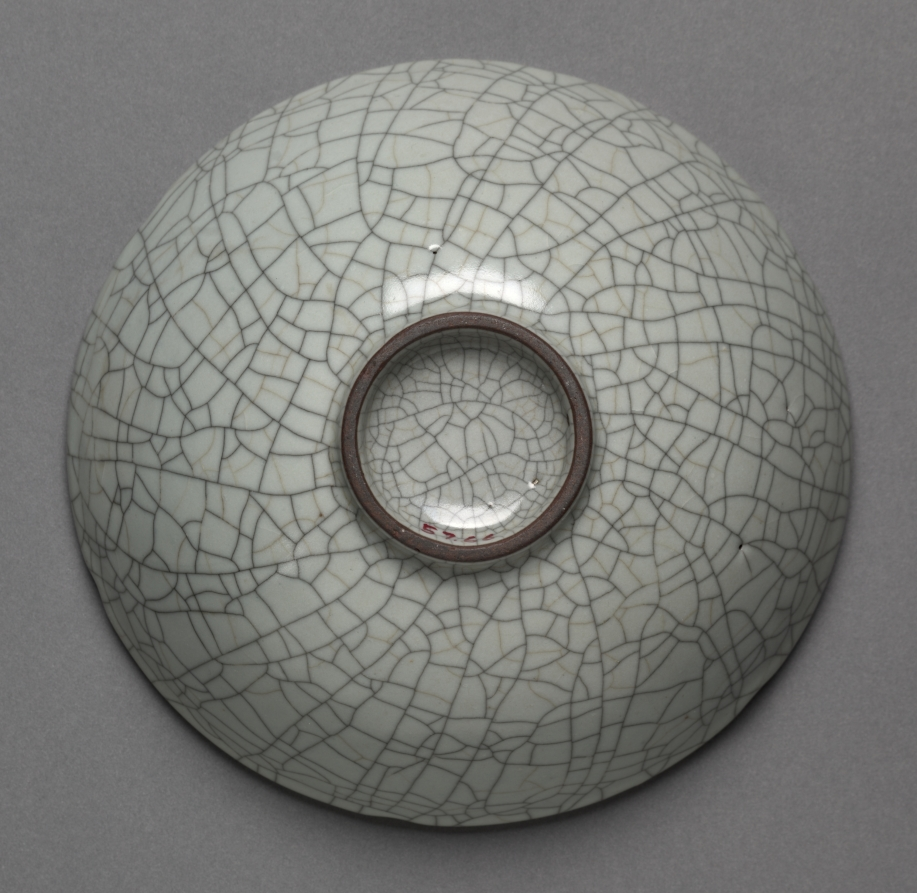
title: Sunflower Bowl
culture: China, Southern Song dynasty (1127-1279)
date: 1127–1279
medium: glazed reddish-brown porcelain, Guan ware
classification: Ceramic